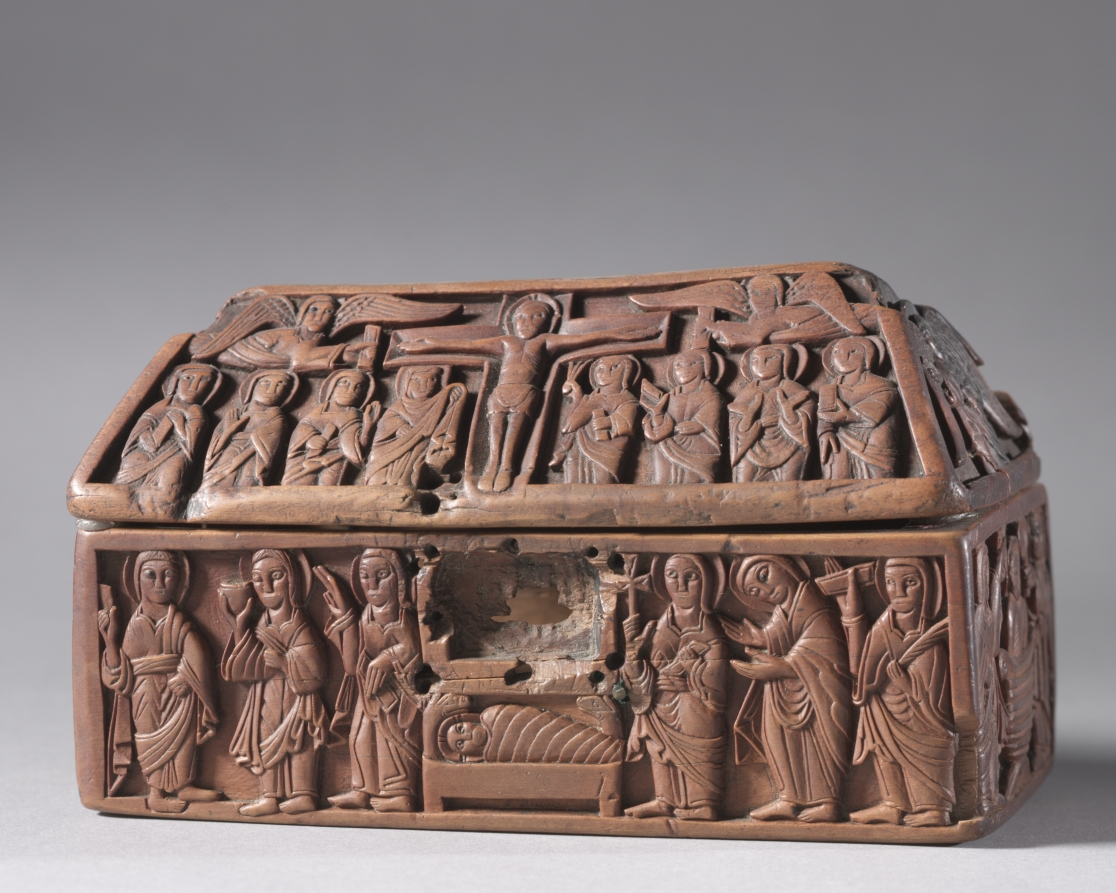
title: Wooden Casket: Scenes from the Life of Christ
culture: Anglo-Saxon, England, West Midlands?, Romanesque period, 11th century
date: c. 1050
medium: boxwood, copper-alloy, glass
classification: Furniture and woodwork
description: This casket is a rare, if not unique example of high-quality woodcarving from Anglo-Saxon England. Decorated with scenes from Christ’s life, it was likely made for an ecclesiastical purpose and may have housed relics. On one long side, the Christ child rests in the manger. Above, the Crucifixion is shown with mourners gathered below the cross and two angels flanking it on either side. On the other long side is the Ascension, God’s hand pulling Christ heavenward. Christ in Majesty appears above. The short sides show Christ’s baptism and his entry into Jerusalem.